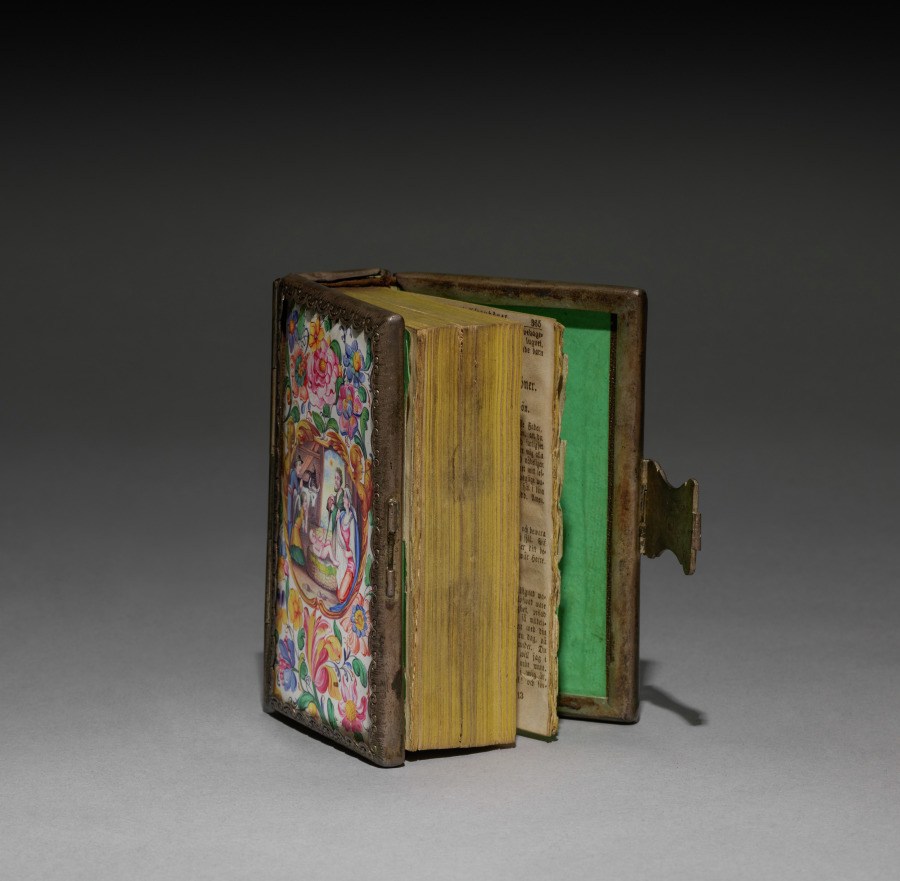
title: Carnet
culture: Sweden, 19th century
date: 1863–1865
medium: enamel on copper and silver gilt book binding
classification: Miscellaneous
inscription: inside is psalm book written in German, with handwritten dedication on cover, dated 25 May 1865.